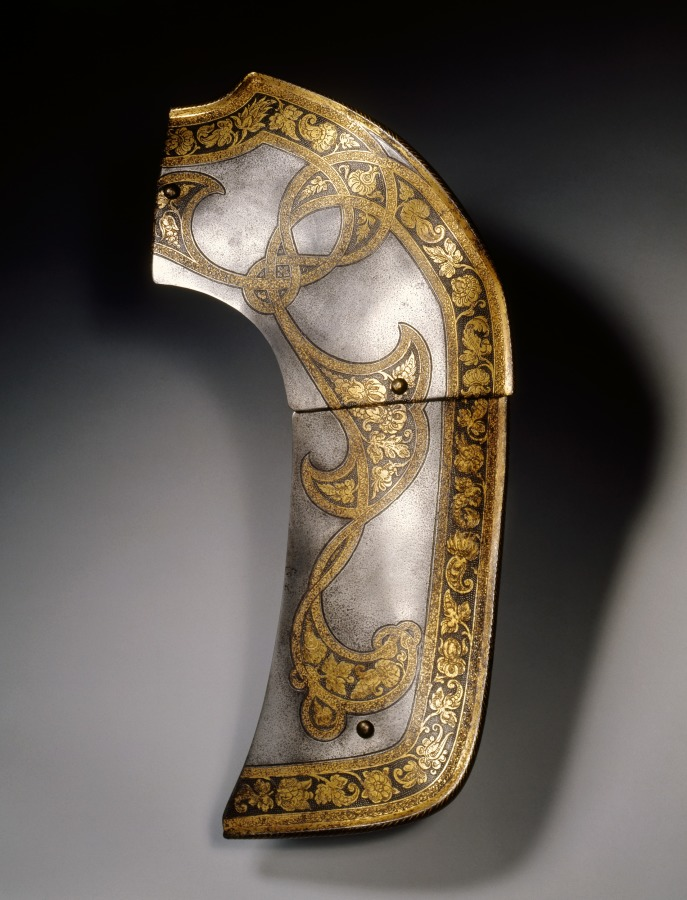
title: Pommel Plates from the Garniture of Rudolf II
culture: Germany, Augsburg, 16th century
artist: Anton Peffenhauser (German, 1525–1603)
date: c. 1571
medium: blued, etched, and gilded steel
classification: Arms and Armor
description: These plates, once part of a saddle, are from a tournament armor for man and horse made for the sons of Emperor Maximilian II, archdukes Rudolf and Ernst. Most of the remaining elements of this armor are still in the collections of the Imperial Armouries in Vienna. The decorative pattern (in the imperial colors of black and gold) forms elegant knots, with distinctive foliage and hop sprigs filling the loops.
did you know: Once part of a saddle, these plates protected the rider's thighs.